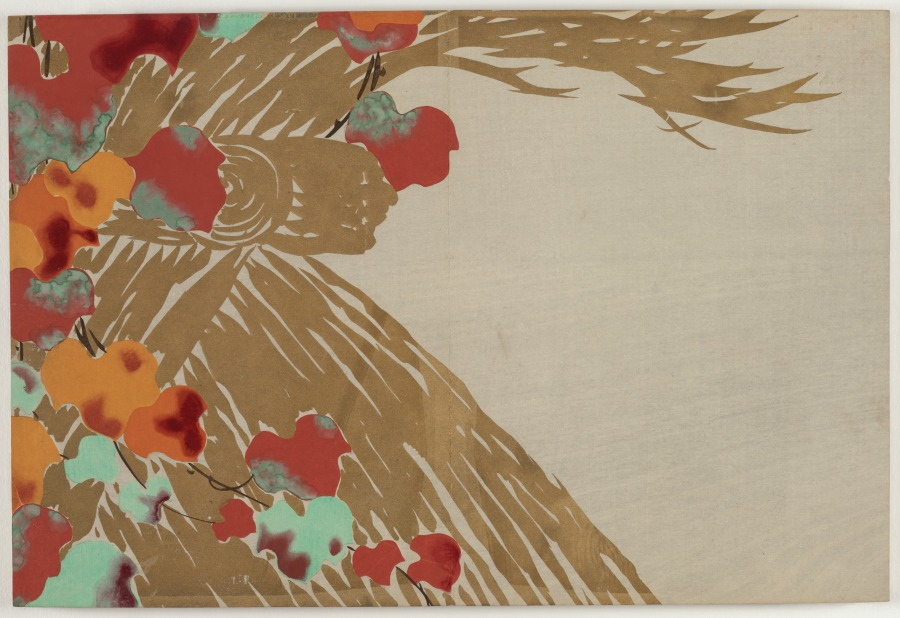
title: Flowers of a Hundred Worlds (Momoyogusa): Ivy (Tsuta)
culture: Japan, Meiji period (1868–1912)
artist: Kamisaka Sekka (Japanese, 1866–1942)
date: 1909–10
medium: color woodcuts with gold and silver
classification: Bound Volume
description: This print from a set of three woodblock printed albums displays the graphic design prowess of Kamisaka Sekka. The images were first distributed one by one to subscribers to the series but later were reissued in bound form, like this book, for mass consumers. Each print features a vignette taken from nature or Japanese literature. Many of the scenes have a long history in Japan, originating in the 900s or 1000s and having been interpreted by all manner of artists since that time. Sekka’s selections hew closely to precedents from the Rinpa style originated by painter Tawaraya Sōtatsu (c. 1570–c. 1640) and calligrapher Hon’ami Kōetsu (1558–1637).